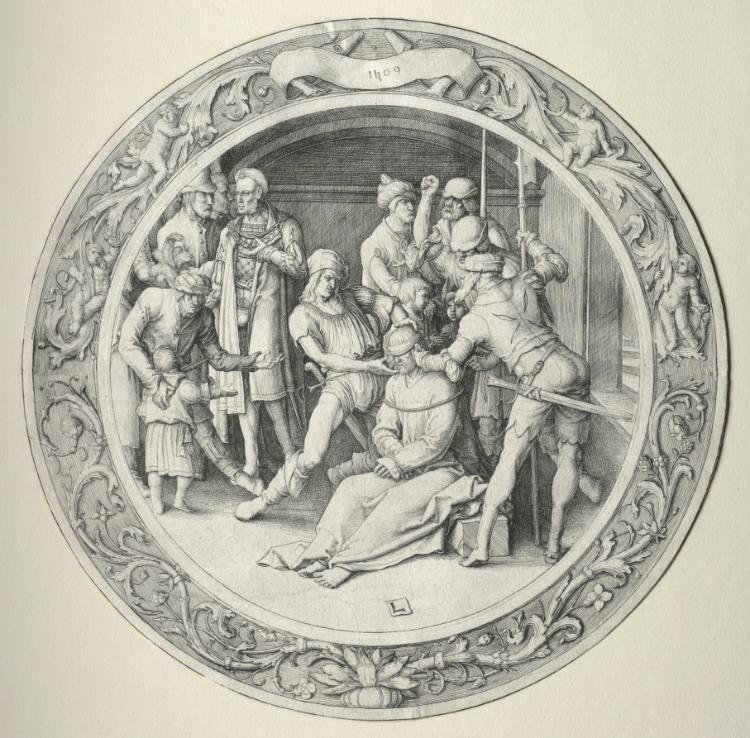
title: The Round Passion: Ecce Homo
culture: Netherlands, 16th century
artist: Lucas van Leyden (Netherlandish, 1494–about 1533)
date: 1509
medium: engraving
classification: Print